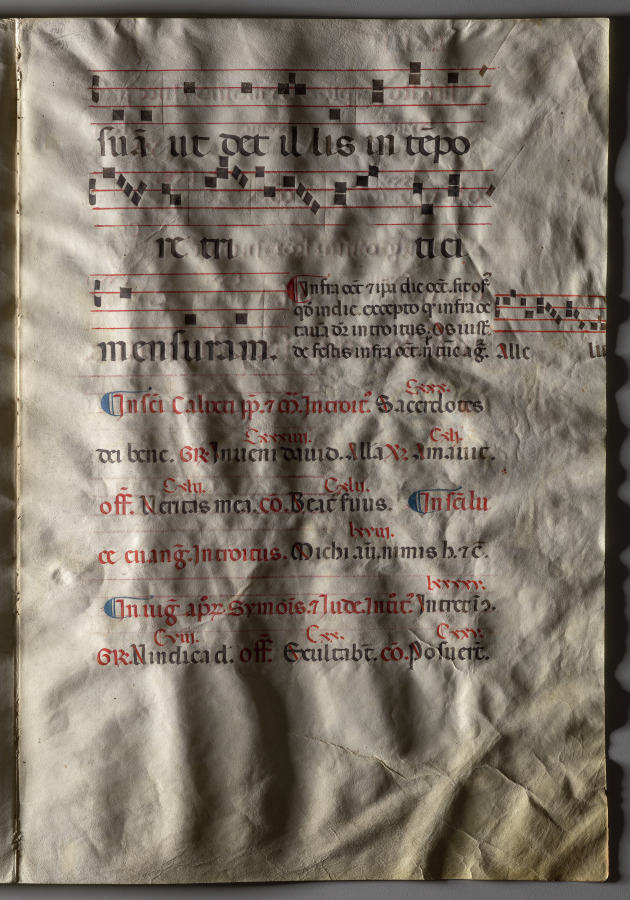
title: Bifolio from a Gradual: Music and Text (verso)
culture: Italy, Siena(?)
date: c. 1300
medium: Ink, tempera, and gold on vellum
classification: Manuscript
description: The large decorated initial G introduces the text, Gaudeamus omnes in Domino (Let us rejoice in the Lord). It is the beginning of the opening prayer, or introit, of the Mass for the Feast of All Saints (November 1). The figures within the initial include Christ, the Virgin Mary, and various saints.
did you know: Words written in red ink, called rubrics, indicate titles and chapter headings that are not part of a manuscript’s main text.